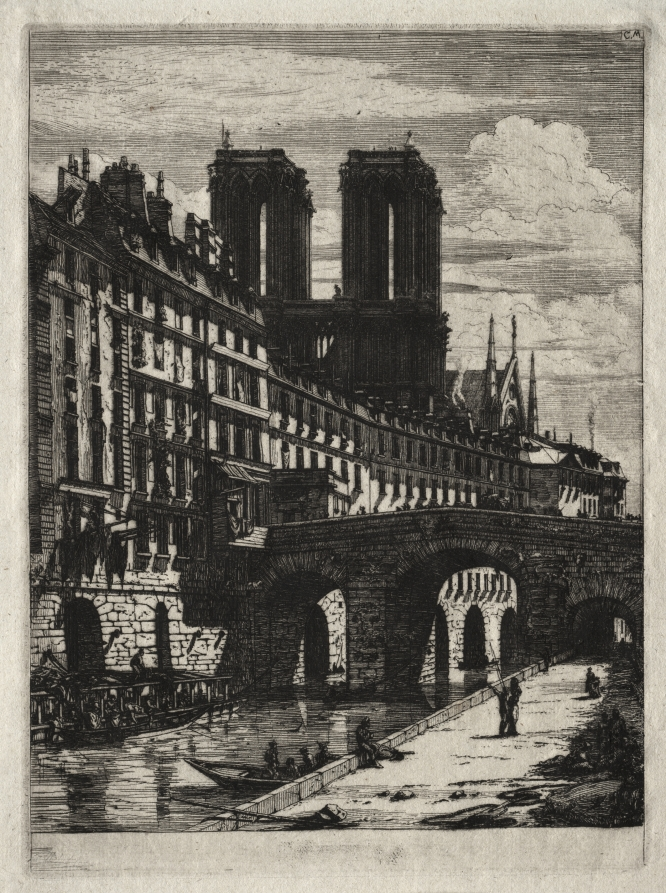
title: Etchings of Paris: Le Petit Pont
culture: France, 19th century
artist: Charles Meryon (French, 1821–1868)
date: 1850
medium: etching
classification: Print